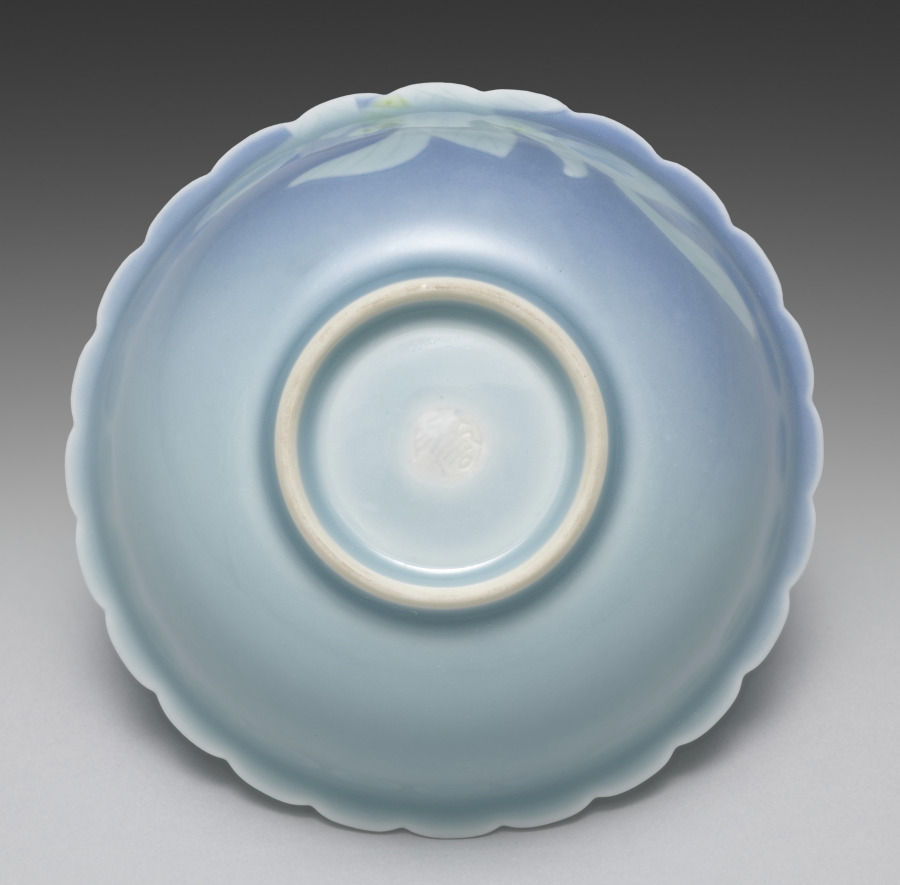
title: Dish from Dishes with Flowers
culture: Japan, Taishō period (1912–26) or Shōwa period (1926–89)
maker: Seifū Yohei IV (Japanese, 1872–1951)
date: 1914–46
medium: One from a set of five dishes; porcelain with underglaze yellow and blue glaze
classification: Ceramic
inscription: 清風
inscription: 清風造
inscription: 成山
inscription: 清風盧人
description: One can imagine a cool summer breeze when looking at this set of dishes, each shaped with a crenulated mouth and glazed with blue. Around the rim and into the basin, the bowls have low-relief designs of flowers with underglaze yellow petals; their leaves and stems show white through the glaze. On each dish, the design continues over the rim onto one side.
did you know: Seifū Yohei IV’s dishes with flowers feature underglaze yellow.